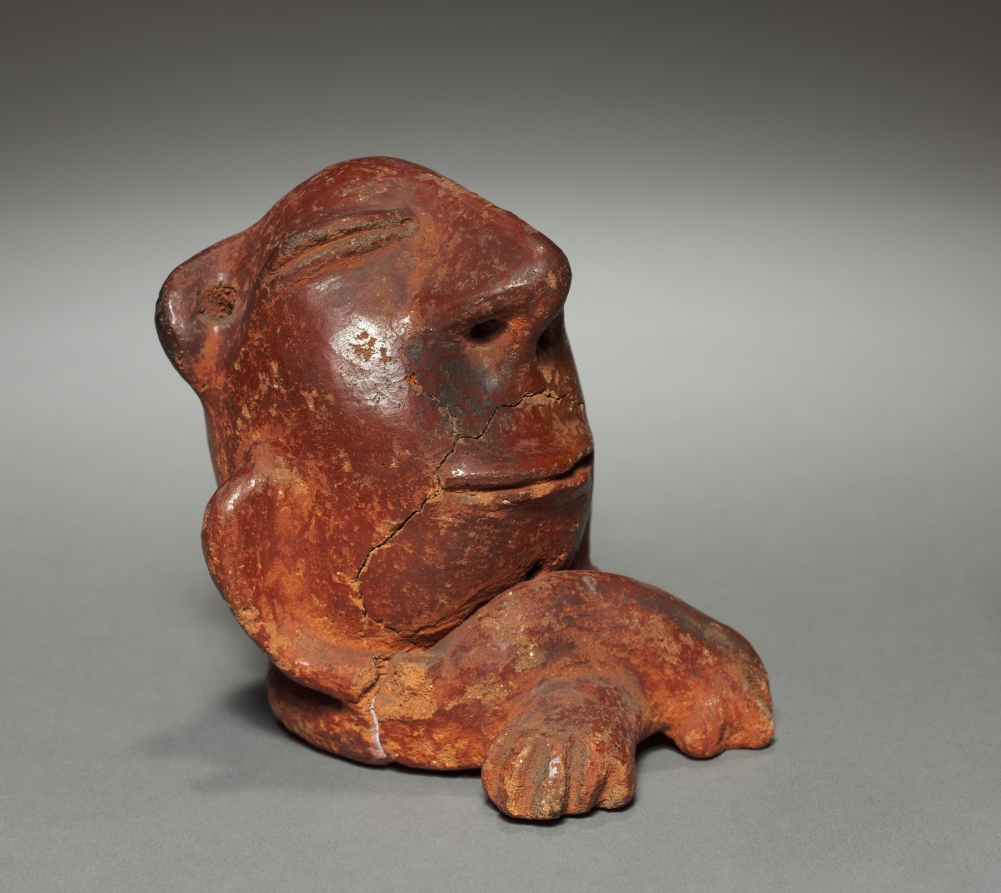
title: Grotesque Figure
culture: Colombia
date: before 1921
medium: red ware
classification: Ceramic